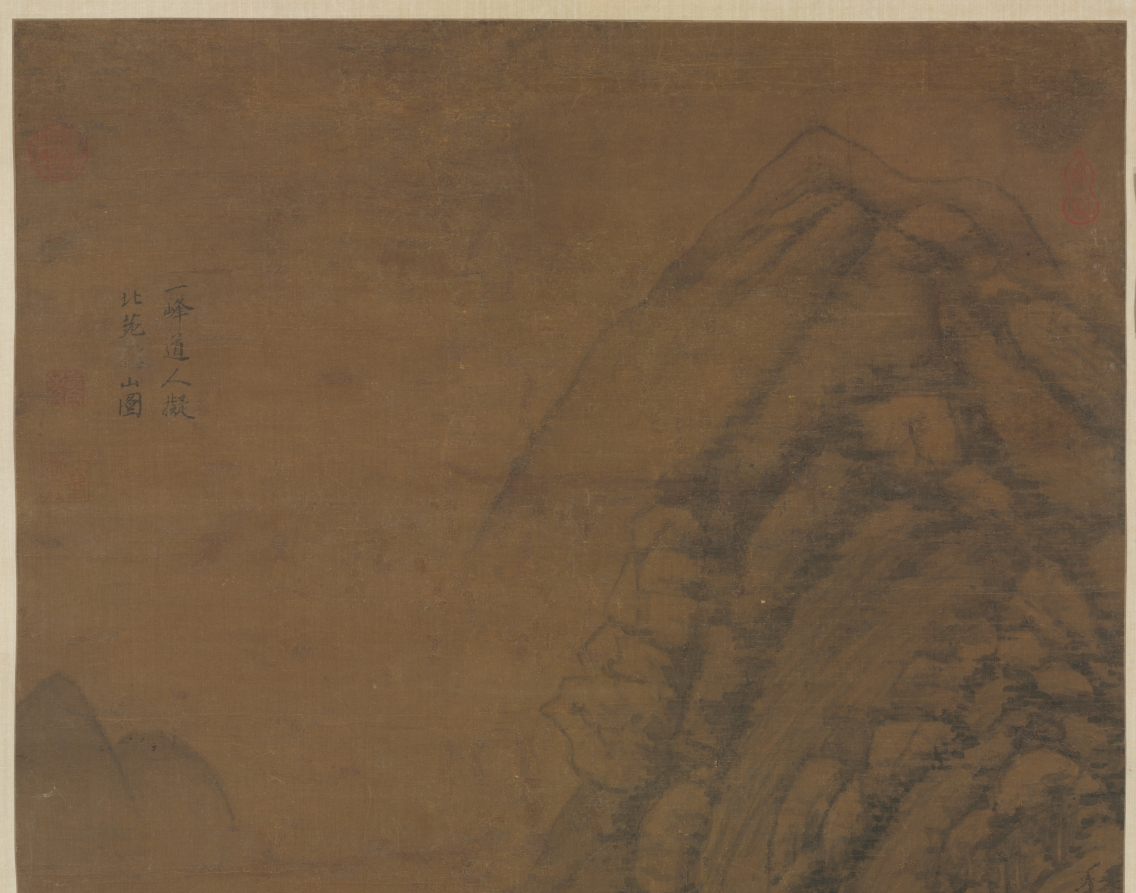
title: Summer Mountains (after Dong Yuan [active c. 937–75])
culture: China, Yuan dynasty (1271-1368)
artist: attributed to Huang Gongwang (Chinese, 1269–1354)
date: 1290–1354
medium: hanging scroll; ink and slight color on silk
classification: Painting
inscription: 【印】一峰道人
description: This monumental landscape is drawn in softly rounded strokes with darker lines frequently applied on top of lighter ones. This technique recalls one of the suggestions included in a collection of the artist's writings known as Secrets of Landscape Painting: The most difficult thing in painting is using the ink. The artist begins by using dilute ink and builds it up to the point where it begins to look right, then uses dense, black ink, applied fairly dry, and washes of deeper-toned ink. This technique distinguishes the fields from the paths, the far from the near. Huang Gongwang may have learned this technique from observing nature through the eyes of an earlier master, Dong Yuan, a painter whose style he shared.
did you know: The wet hills and moist, rich atmosphere evoke the southern Chinese summer, characterized by monsoon rains and lush growth.